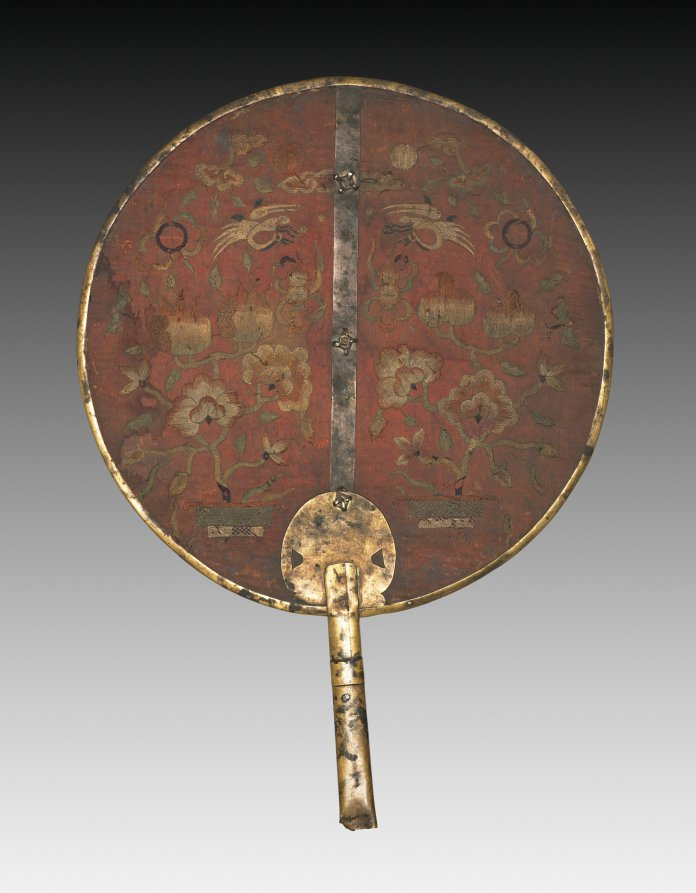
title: Embroidered Fan for Wedding Ceremony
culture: Korea, Joseon dynasty (1392–1910)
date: 1850–1950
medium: Circular fan; copper alloy, silk, metal thread, and paper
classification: Miscellaneous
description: In the Joseon period, women between the ages of 14 and 20 were matched with a husband through an arranged marriage. Even during the marriage ceremony, a bride was supposed to veil her face with this type of embroidered fan as a gesture of chastity. The fan’s body is made of paper and silk trimmed with a gilded metal rim. On the front, four cranes—one pair in blue, the other in yellow—are stitched along with auspicious clouds. The back is adorned with cranes flying amid clouds and blossoms of peonies.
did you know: This fan was not to cool oneself, but rather to veil a bride's face during a wedding ceremony as a gesture of chastity.